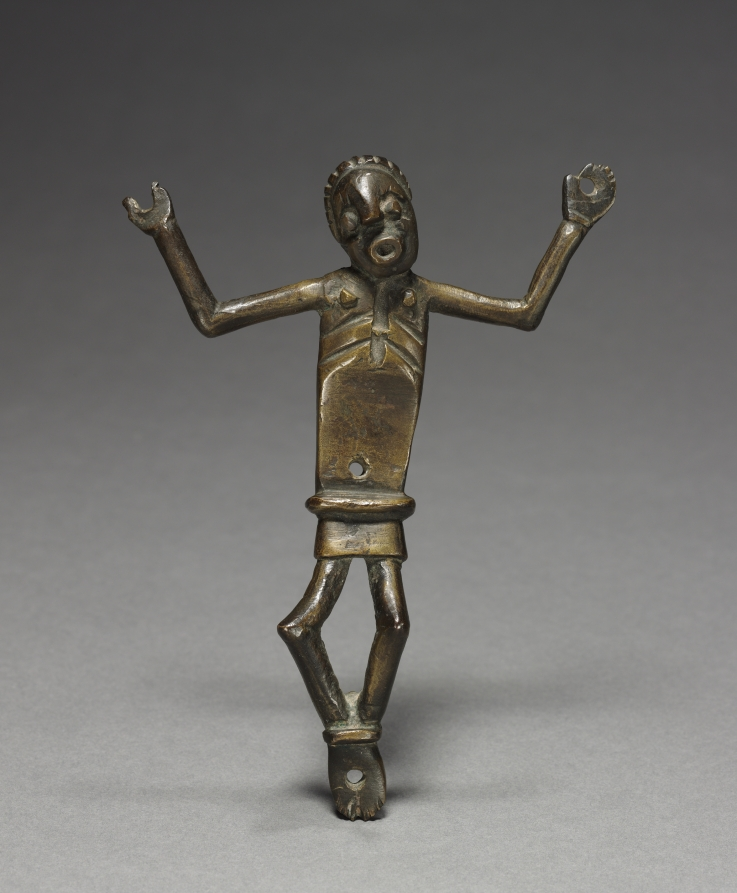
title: Corpus (Crucified Christ)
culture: Central Africa, Democratic Republic of the Congo or Cabinda, Kongo people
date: late 1800s-early 1900s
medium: Copper alloy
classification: Sculpture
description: One of two Christian-inspired objects in the Delenne collection identifying the far-reaching networks of trade, diplomacy, religion, and cross-cultural exchange. Kongo Christian symbols were created as spiritual tools to help explain and alleviate the turbulent situation between Central African religion and Catholicism. This figurine is geometric in style, combining both Christian ideals and preexisting Kongo artistic practices. Its pierced hands and feet link him to crucifixion images.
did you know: This figure combines Kongo artists’ attention to symmetry with the Western depiction of Christ, lifeless on the cross.